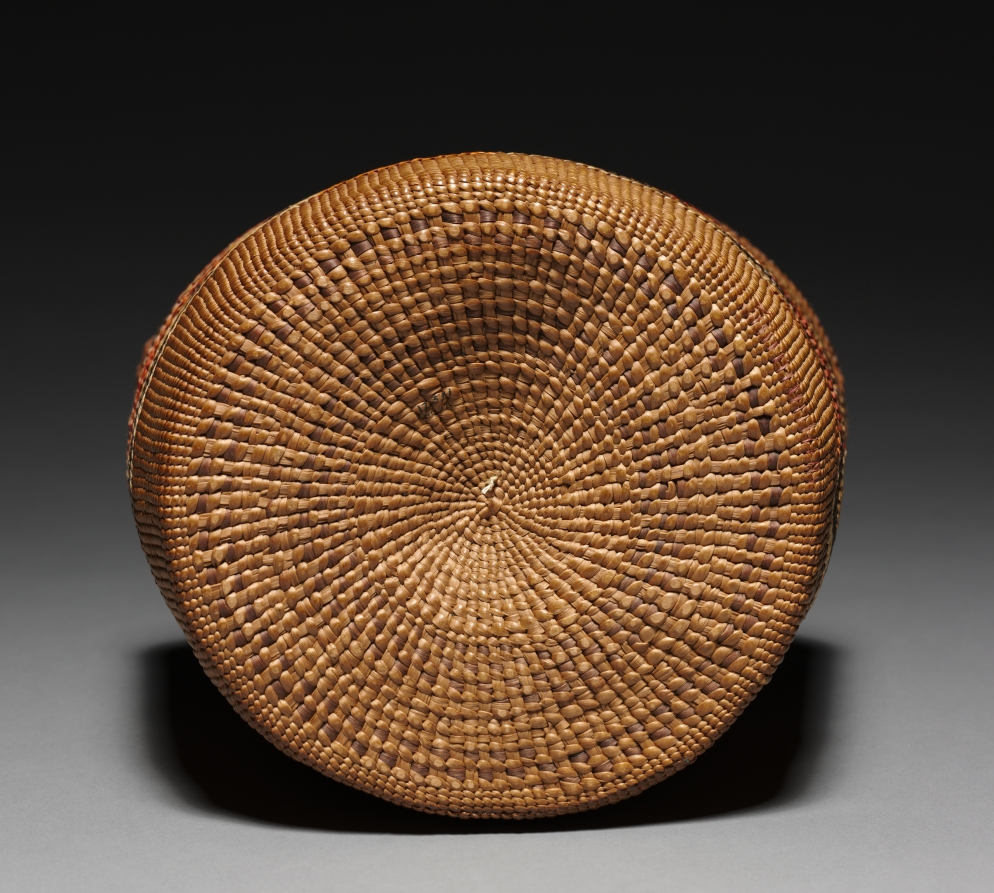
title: Bowl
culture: Northwest Coast, Tlingit, Unassigned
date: Unassigned, before 1917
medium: twined, imbricated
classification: Basketry